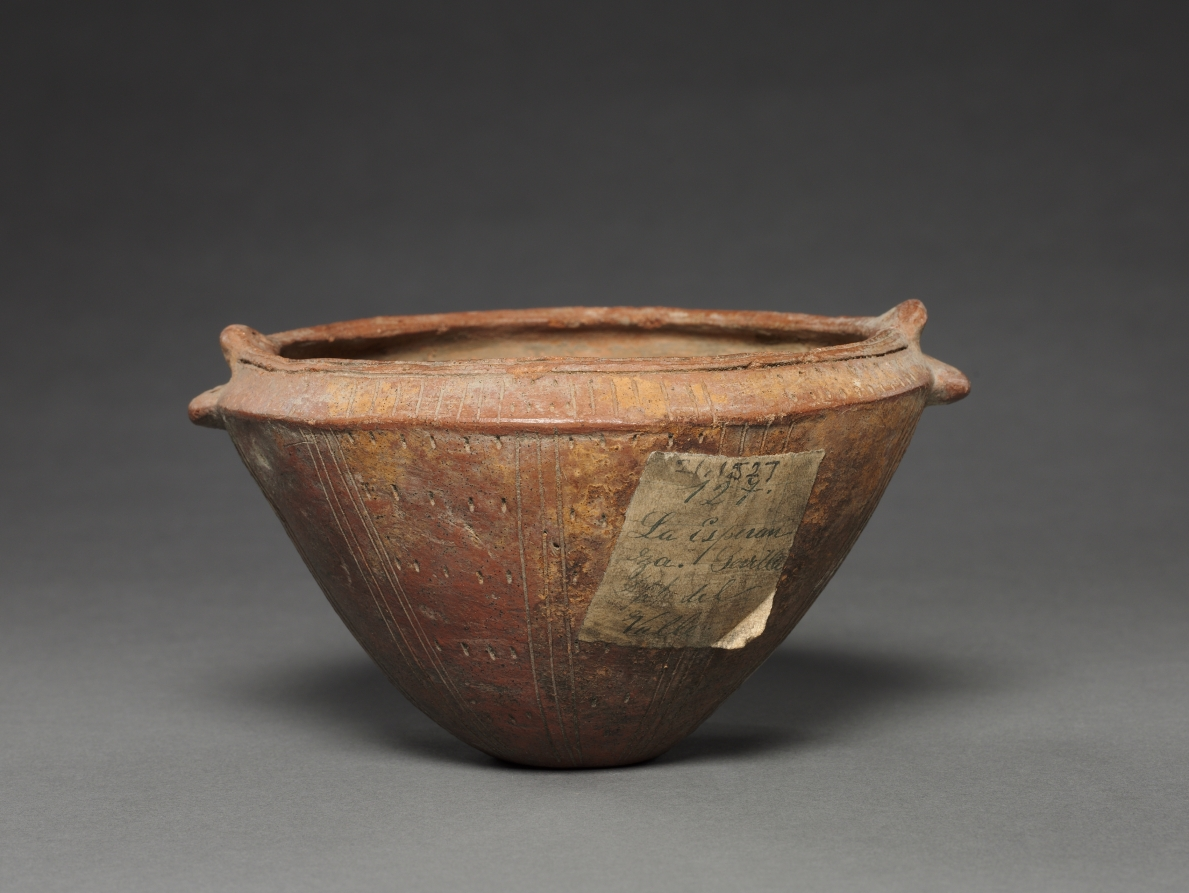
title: Dish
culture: Colombia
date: before 1550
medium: red ware with incised patterns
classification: Ceramic